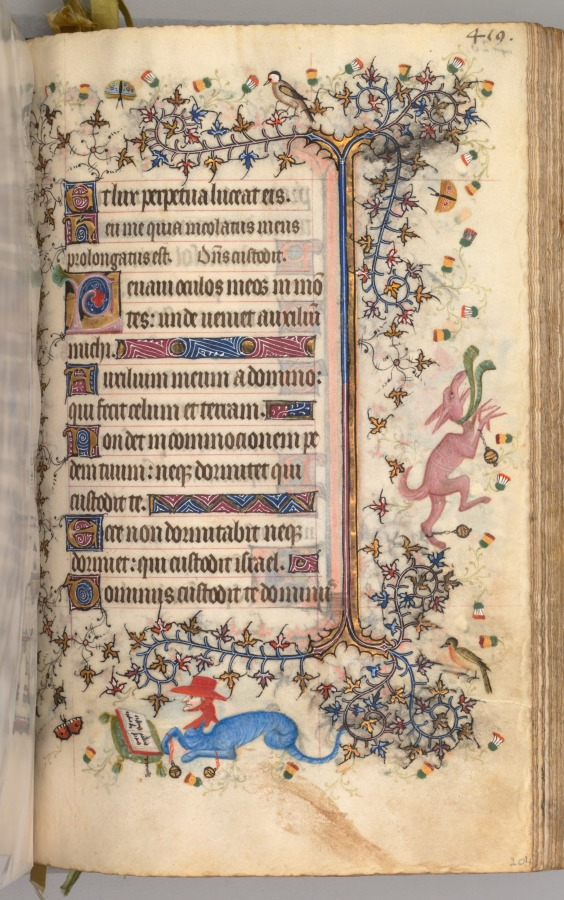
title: Hours of Charles the Noble, King of Navarre (1361-1425): fol. 204r, Text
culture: France, Paris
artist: Master of the Brussels Initials and Associates (French)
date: c. 1405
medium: ink, tempera, and gold on vellum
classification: Bound Volume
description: This precious volume was obviously highly prized by its owner, the French-born King of Navarre, who had his coat of arms painted on no less than twenty folios. Rather than directly commissioning this manuscript from a specific workshop, it seems that Charles the Noble acquired his book of hours -- perhaps ready-made for the luxury market -- while on a trip to Paris in 1404-05. A collaborative effort, six painting styles are evidenced within the pages of this codex, those of two Italians, two Frenchmen, and two Netherlanders. The painter who was responsible for the planning and decoration of the book, and who produced seventeen of the large miniatures, was a Bolognese artist known as the Master of the Brussels Initials. His principal assistant, responsible for most of the borders, was a Florentine who signed his name "Zecho" da Firenze on folio 208 verso.